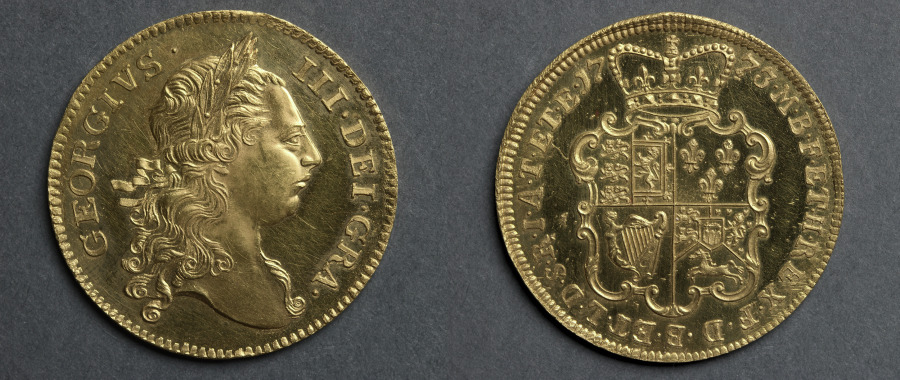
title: Two Guinea Piece: George III (obverse); Shield of Arms (reverse)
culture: England, George III, 1760-1820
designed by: John Sigismund Tanner (British, 1705–1775)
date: 1773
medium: gold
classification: Coins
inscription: DEI . GRA . GEORGIVS . III .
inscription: M B F ET H REX F D B ET L D S R I A T ET 1773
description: This very rare piece is another example of the fine patterns being produced at this period. With the coming reform of the coinage, the five- and two-guinea pieces do not appear again for general circulation. John Sigismund Tanner came to England in 1728, was appointed chief engraver in 1741 and died in 1775. He was responsible for a large number of pattern coins and for most of the second "old head" type of currency coins issued during the reign of George II.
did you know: The year this coin was minted, colonists in Boston raided three British ships throwing several hundred chests of tea into the harbor.